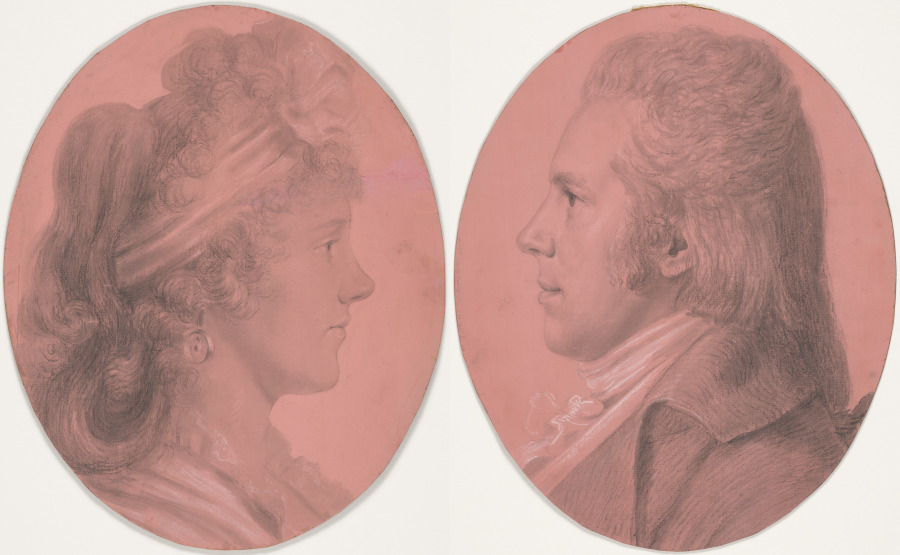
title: Portrait of Eleanor Ramsay Fitzwilliam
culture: France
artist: Charles Balthazar Julien Fevret de Saint-Mémin (French, 1770–1852)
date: c. 1790–1852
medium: Black and white chalk on buff paper with pink wash in original frame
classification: Drawing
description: This portrait and its pair (2024.35.1), depict George Fitzwilliam, an English merchant, and his American wife Eleanor Ramsay Fitzwilliam, who sat in New York for the French émigré artist Charles Balthazar Julien Févret de Saint-Mémin. Saint-Mémin used a recently invented mechanical device called a physiognotrace to trace accurate profiles of his sitters, which he then completed in black and white chalks. The technology enabled Saint-Mémin to establish a thriving business catering to prominent Americans—including Presidents Washington, Adams, Jefferson, and Madison, Benjamin Franklin, and several Native American chiefs—at a time when he was in exile from the French Revolution. As part of each commission, Saint-Mémin also supplied etchings of the portrait in a reduced size, which could be given as keepsakes to family and friends.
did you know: The physiognotrace device used to create this portrait consisted of a wooden frame within which a sitter posed in profile; the artist then peered through an eyepiece and followed the contour and features of the sitter’s face by maneuvering a graphite pencil attached to the mechanism.